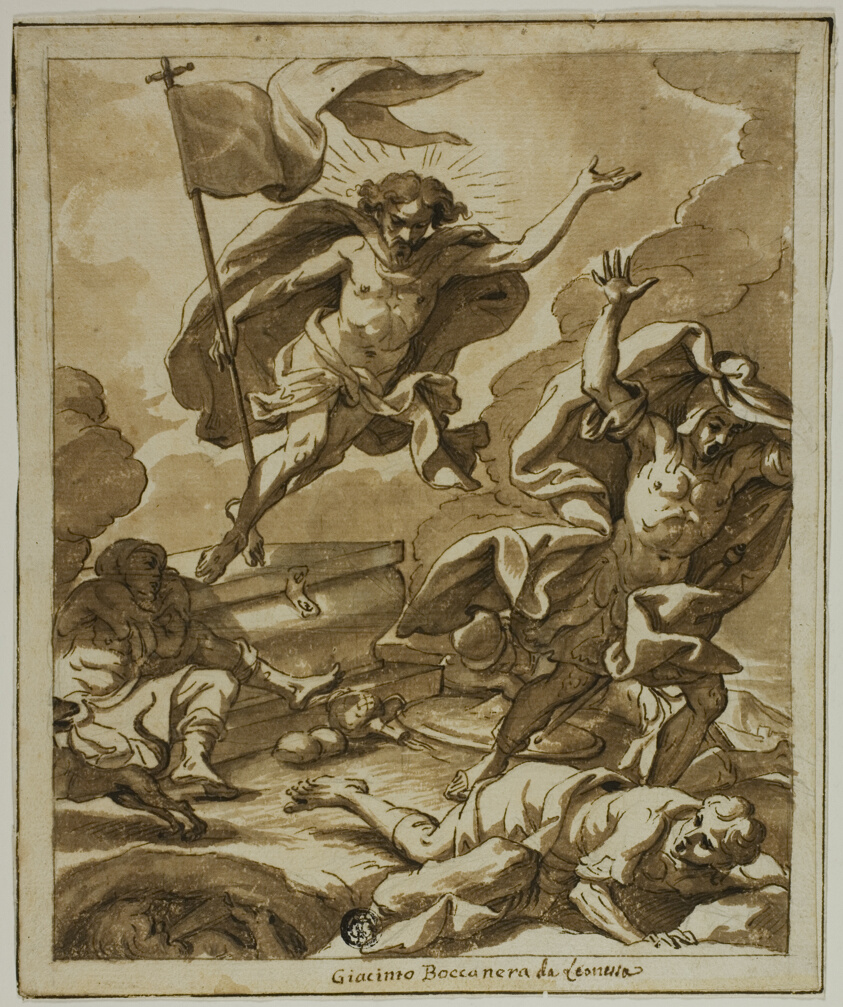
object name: Drawing and Watercolor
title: Resurrection of Christ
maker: Attributed to Giacinto Boccanera; Italian, 1666-1746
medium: Pen and brown ink, with brush and brown wash, over traces of black chalk, on ivory laid paper, laid down on ivory laid paper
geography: Italy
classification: ink or chalk wash; drawings (visual works); prints and drawing